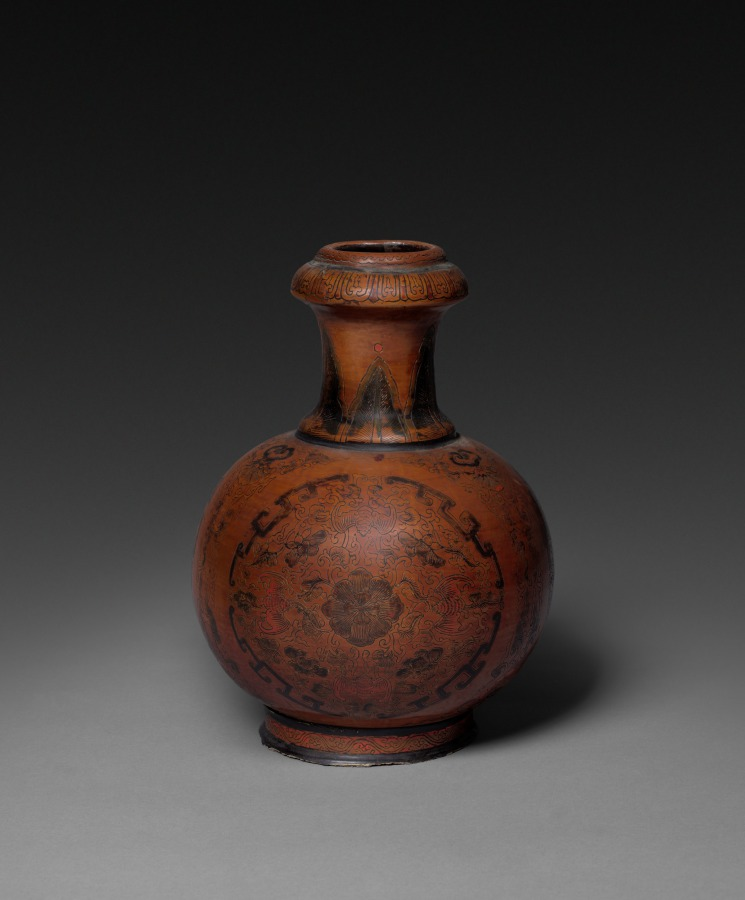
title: Vase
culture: China, Qing dynasty (1644-1911)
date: 1644–1911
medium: lacquered wood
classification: Lacquer